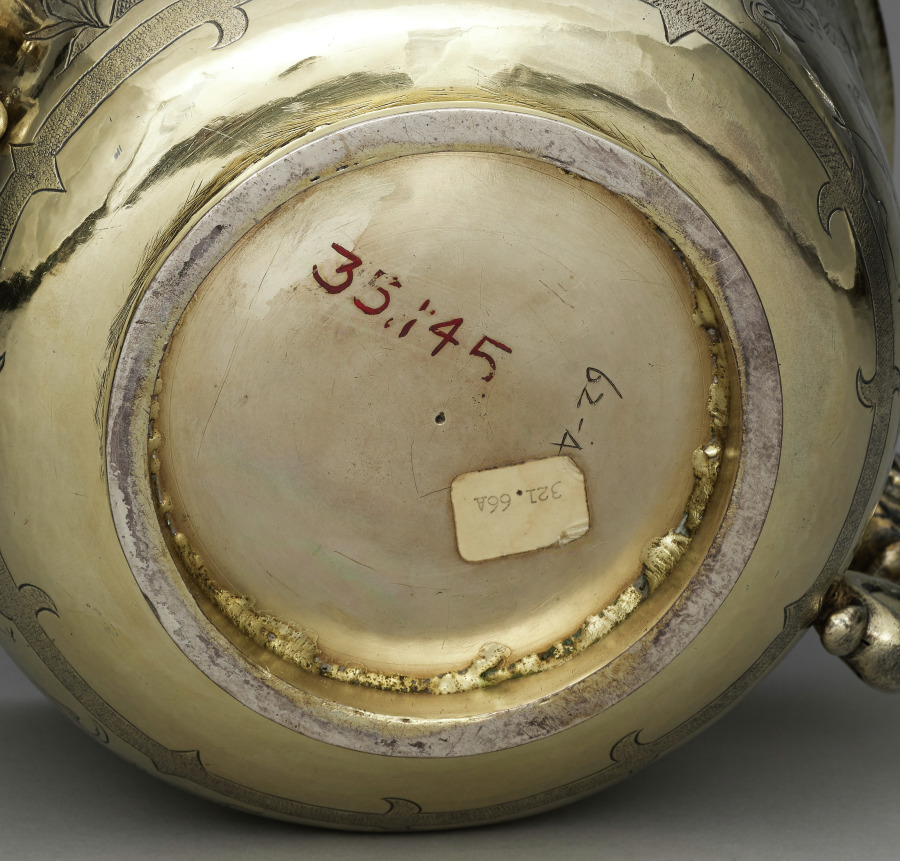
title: Two-Handled Cup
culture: England, London, 17th century (James II)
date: 1686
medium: silver gilt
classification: Silver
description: Produced a year after the coronation of James II (1633–1701), this silver cup and the accompanying lid celebrate the monarchy and reflect the political and social alliances that underpinned the aristocracy during the 1600s. During their coronation, James II and his second wife Mary of Modena (1658–1718) were carried through the city of London under a silk canopy adorned with motifs inspired by European perceptions of Chinese art, known as chinoiserie. Following the procession, the thirty-two lords involved in the ceremony were each offered a portion of the cloth from the canopy as well as sixteen troy ounces of silver from the posts. At least two of them commissioned cups adorned with chinoiserie to be made from the silver. While it is unclear if this cup once belonged to one of the thirty-two peers, it was almost certainly created in response to the same motifs and social developments.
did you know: This two-handled cup is accompanied by a lid. See cover record.